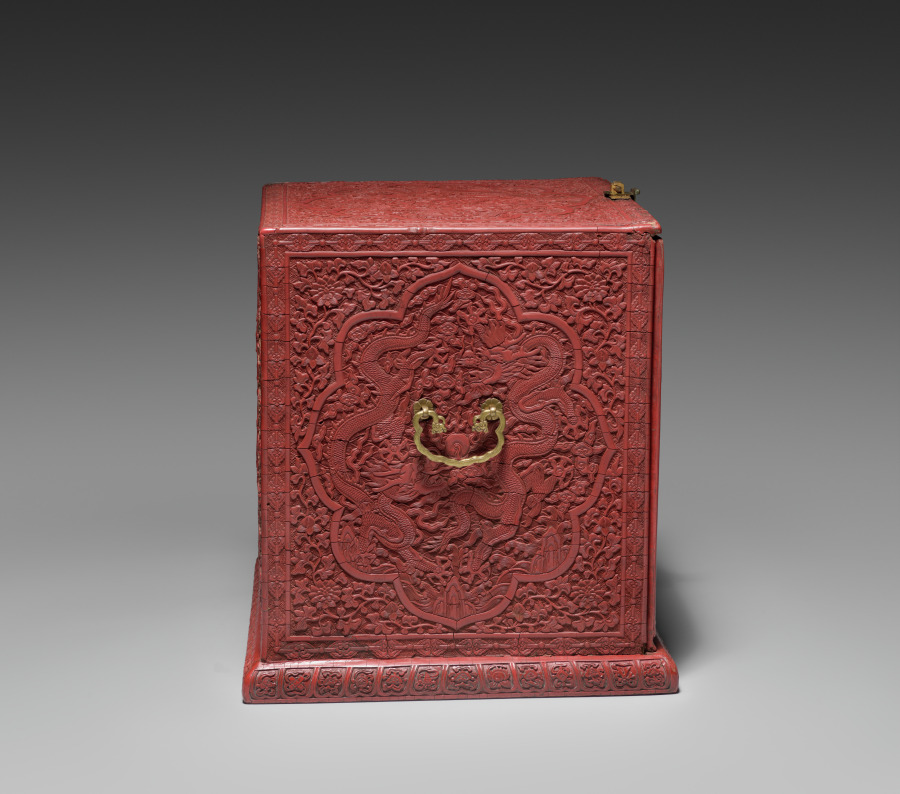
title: Tihong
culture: China, Ming dynasty (1368-1644), Wanli reign (1572-1620)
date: 1585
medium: carved cinnabar lacquer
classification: Lacquer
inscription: 大明萬曆乙酉年製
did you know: An inscription on the base of the chest dates it to 1585.